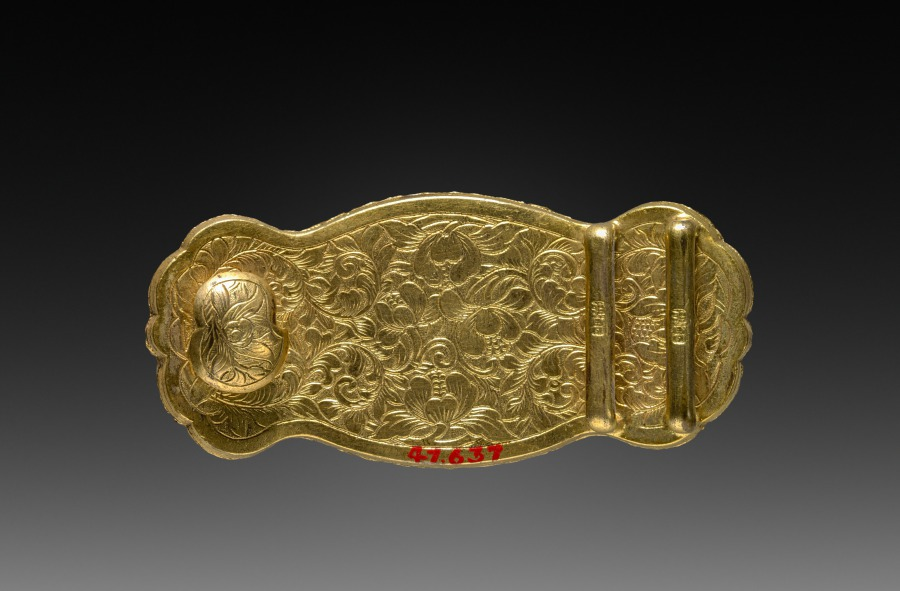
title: Buckle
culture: China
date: 1900s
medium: silver gilt, engraved and set with green jade and rose quartz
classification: Jewelry